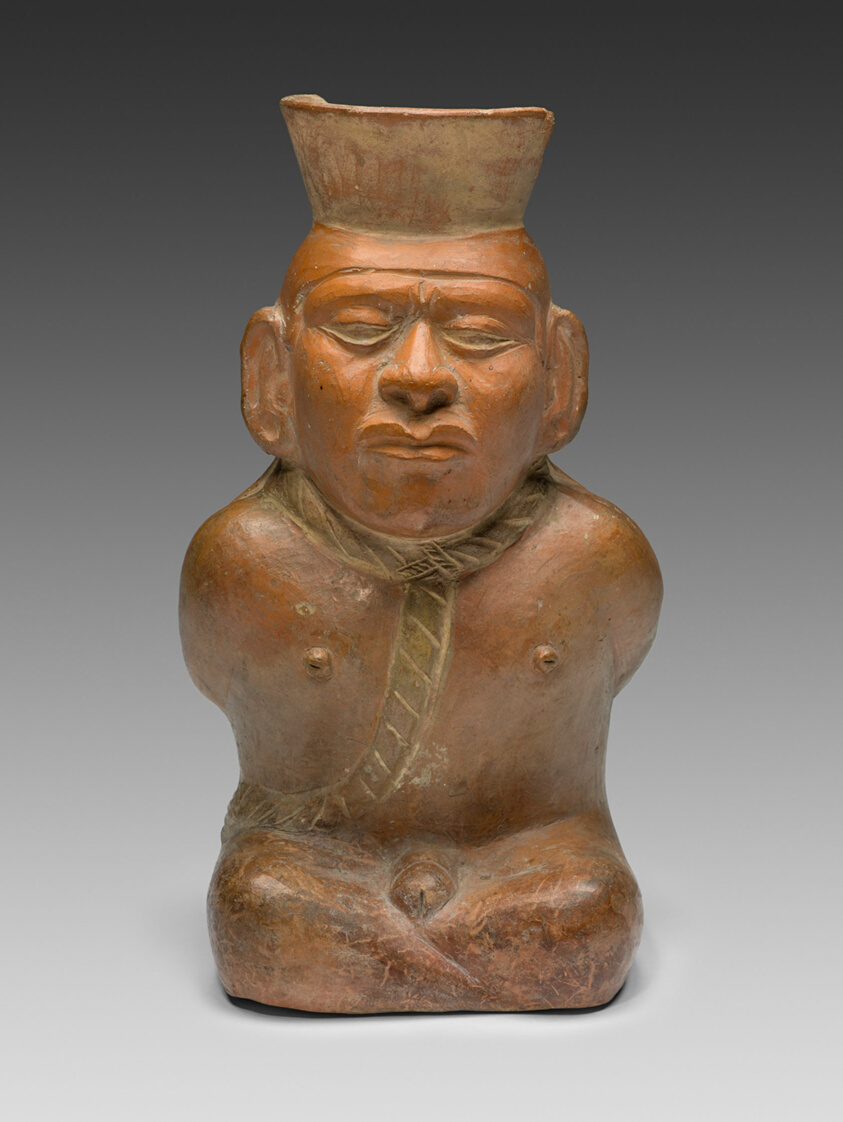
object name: Vessel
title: Portrait Vessel of a Captive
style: moche, mochica, early intermediate period, Pre-Columbian, americas, andes, Arts of the Americas, andean, south american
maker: Moche (North coast, Peru)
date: 100 BCE–500 CE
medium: Ceramic and pigment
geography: Peruvian North Coast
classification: earthenware; ceramics; vessel; art of the americas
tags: people, sacrifice, ritual sacrifices, rituals, portraits